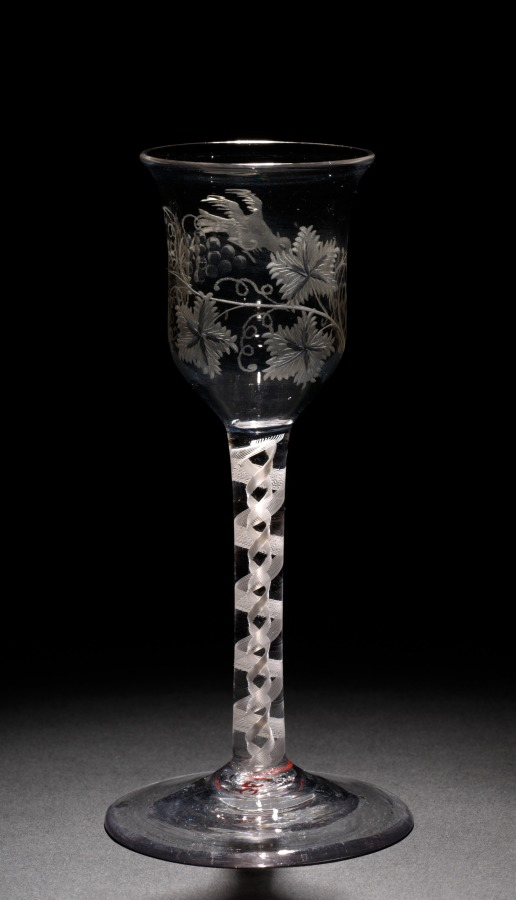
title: Wine Glass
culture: England, 18th century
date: 1750–1799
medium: glass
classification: Glass